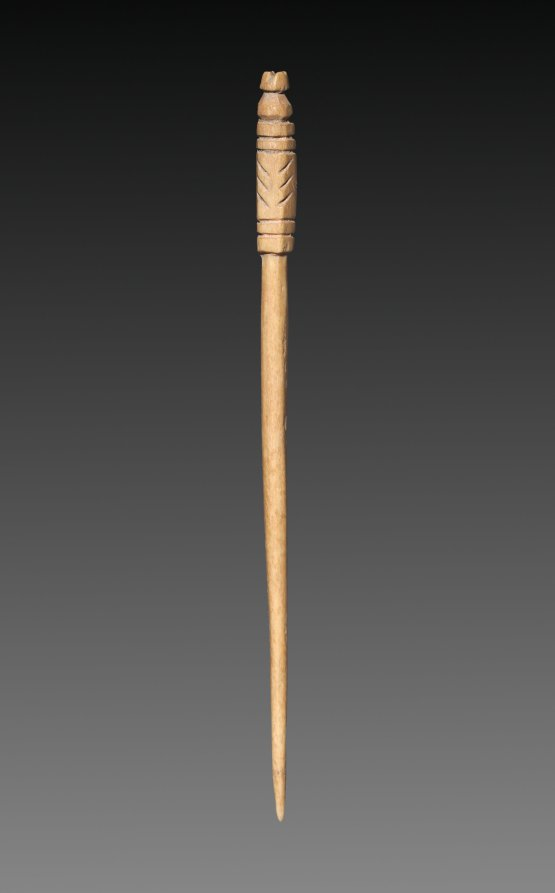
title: Stick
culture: Parthian Empire (247 BCE–224 CE)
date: 1–200 CE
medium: bone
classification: Miscellaneous